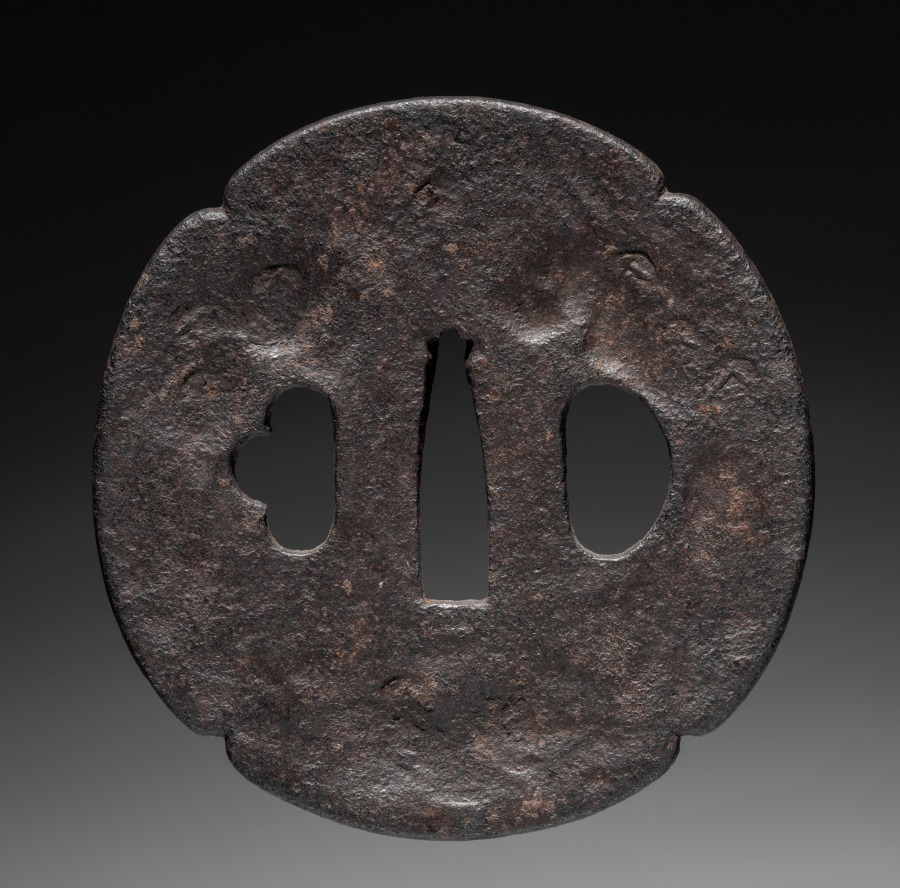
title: Sword Guard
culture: Japan, Edo period (1615–1868)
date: early 1800s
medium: iron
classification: Arms and Armor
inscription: Signature: Tempo